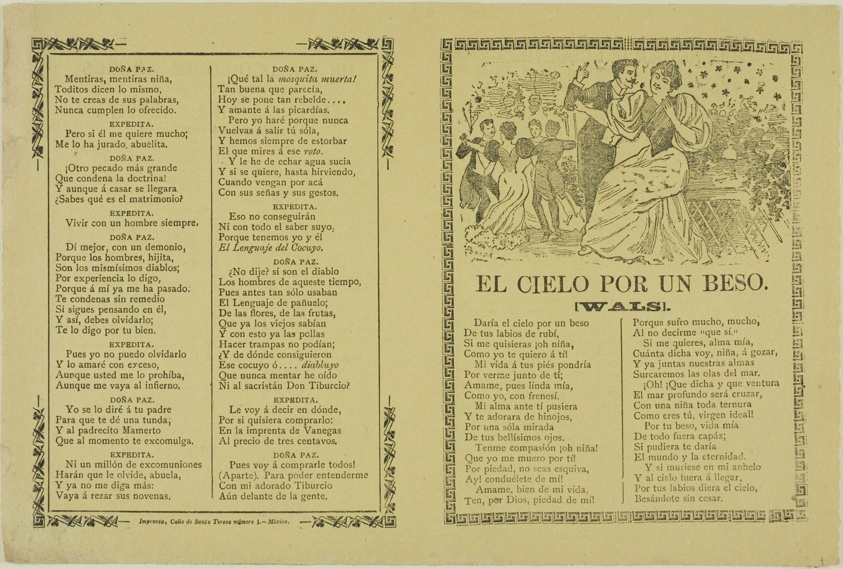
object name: Print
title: The Sky for a Kiss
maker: José Guadalupe Posada (Mexican, 1852-1913)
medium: Lithograph on paper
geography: Mexico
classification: lithograph; print; prints and drawing